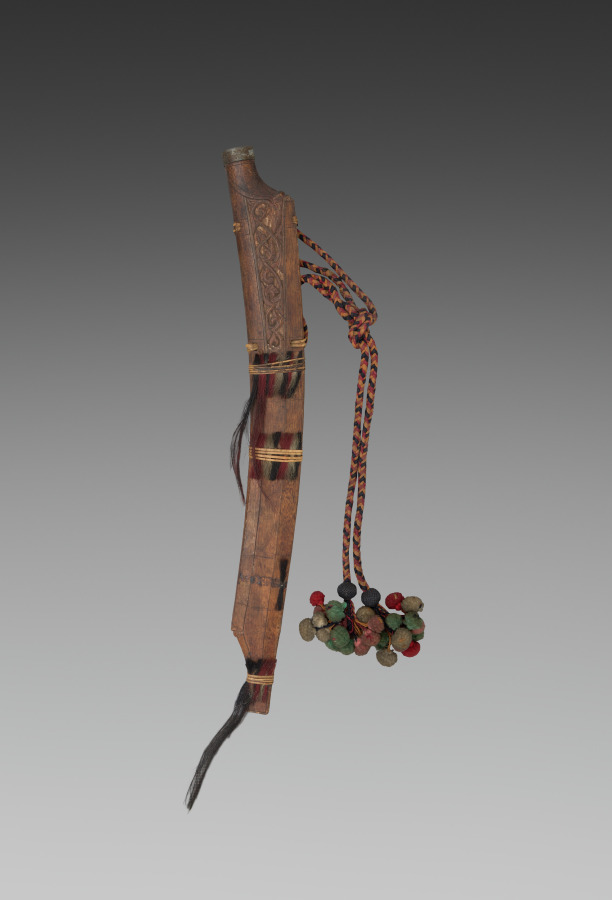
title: Scabbard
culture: Philippines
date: before 1916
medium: Wood and metal with braided cloth cord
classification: Arms and Armor